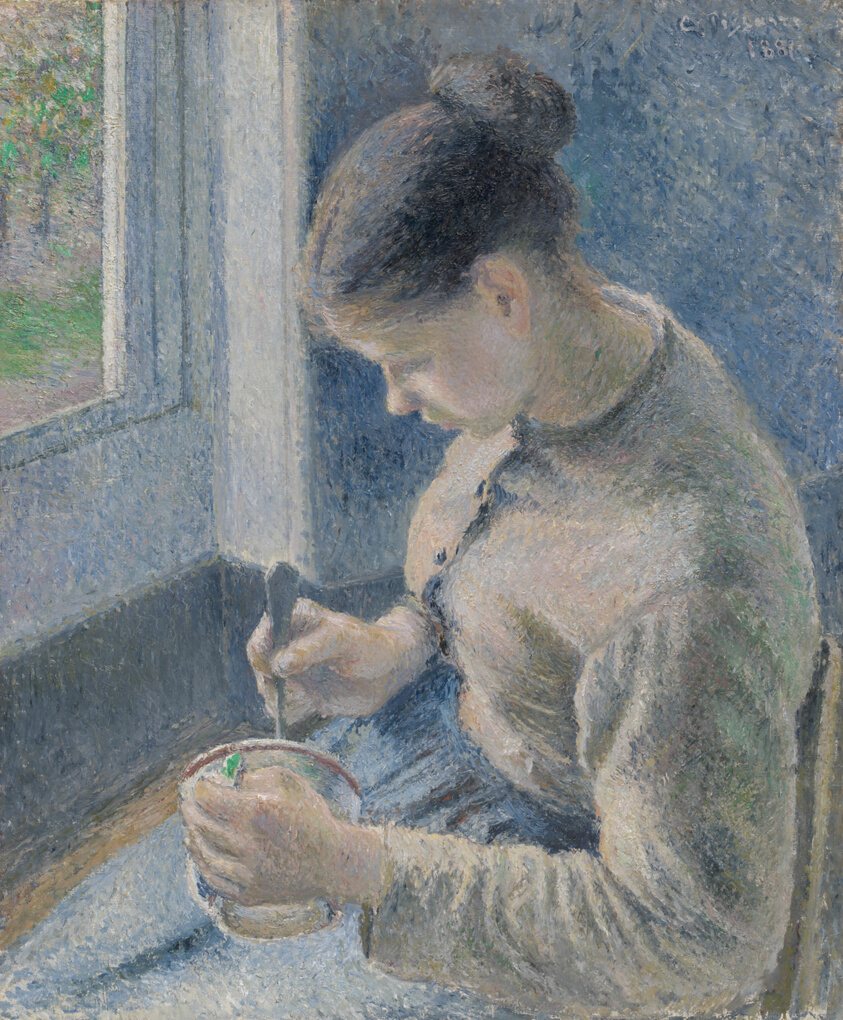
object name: Painting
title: Young Peasant Having Her Coffee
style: Post-Impressionism, nineteenth century, 19th century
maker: Camille Pissarro (French, 1830–1903)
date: 1881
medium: Oil on canvas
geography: France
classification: painting; paint; oil paintings (visual works); oil on canvas; french; european painting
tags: women, woman, coffee, woman, interior, cup, peasants, youth, window, domestic, domestic scenes, everyday life (genre), portraits, Century of Progress, world's fairs, Chicago World's Fairs